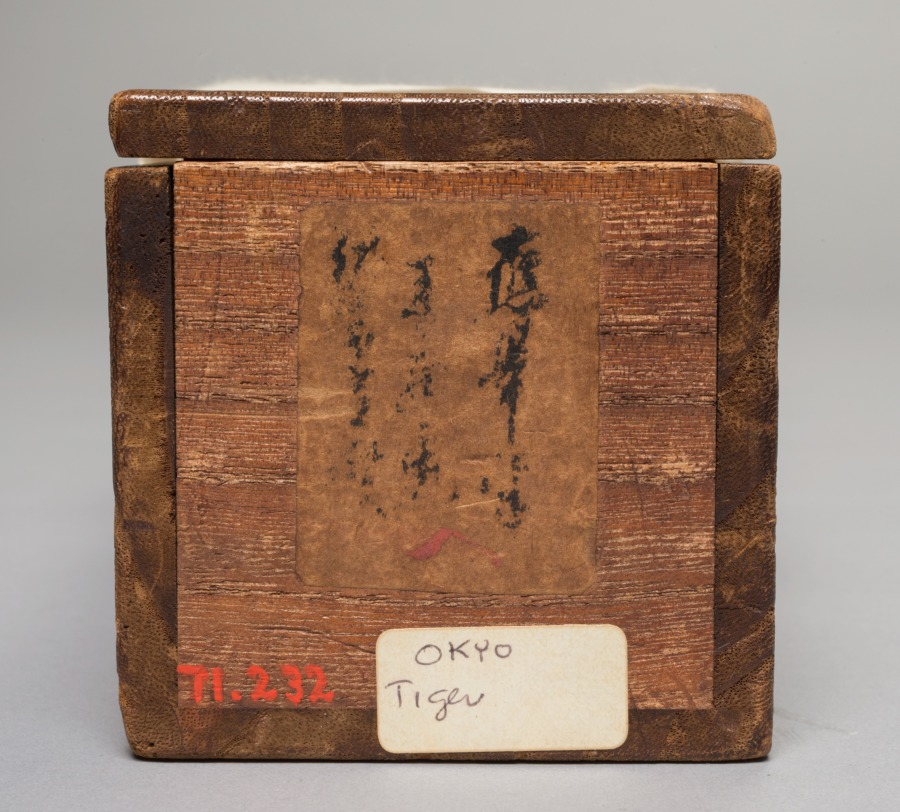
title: Tiger in Wind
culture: Japan, Edo period (1615–1868) to Meiji period (1868–1912)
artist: after Maruyama Ōkyo (Japanese, 1733–1795)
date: 1800s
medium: hanging scroll; ink on paper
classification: Painting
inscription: 「秋空一鶴」賛 長嘯一聲風括地「月渚」朱文方印「祐常之章」白文方印 壬辰初冬寫応挙 「應舉之印」白文方印・「仲選」白文方印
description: The seals appended to the inscription on this painting suggest that the text was brushed by Yūjō (1723–1773), an imperial prince who became a Buddhist monk and was abbot of Enman'in at Miidera. The line is from a poem attributed to a Yuan dynasty poet, Yu Ruyu (dates unknown), and describes the sound of a fierce wind lashing the ground. Wind is associated with the roar of the tiger. Yūjō was Maruyama Ōkyo's most important patron as a young artist, and this painting has a signature asserting that Ōkyo created it in 1772, the year before Yūjō's death. While Yūjō produced a preface for a now famous set of handscrolls he commissioned Ōkyo to paint, and a number of Ōkyo's compositions for Enman'in survive, this work would appear to be one imagining their relationship, as opposed to a genuine piece.